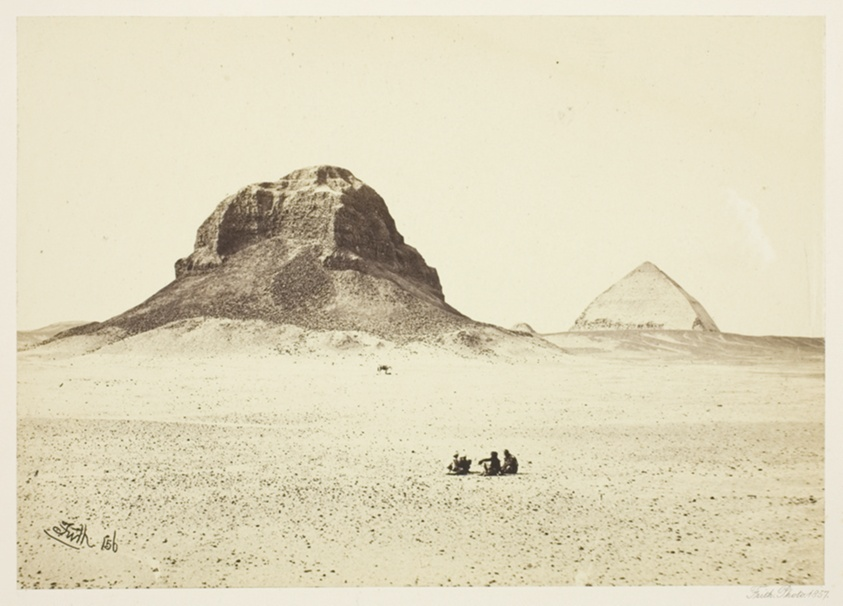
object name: Photograph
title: The Pyramids of Dahshoor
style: 19th century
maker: Francis Frith (English, 1822–1898)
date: 1857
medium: Albumen print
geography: England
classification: albumen silver print; photographic process; photography; photograph